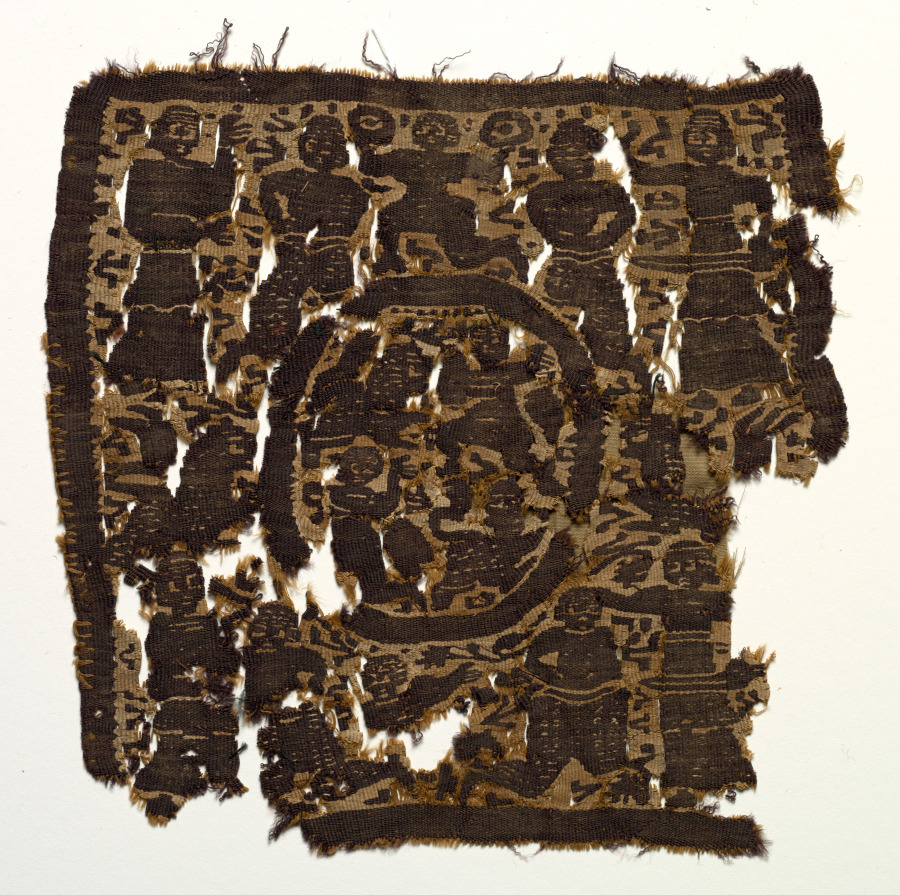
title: Square Segmentum with Combat Scenes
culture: Egypt, Byzantine period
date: 500s - early 600s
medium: tapestry (originally inwoven in tabby ground); linen and wool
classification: Textile